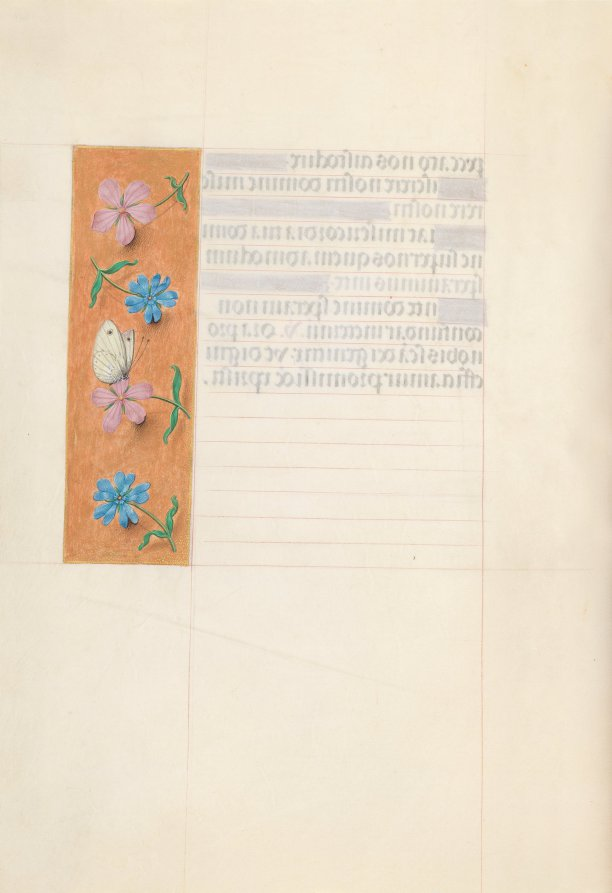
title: Hours of Queen Isabella the Catholic, Queen of Spain: Fol. 114v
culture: Flanders, Ghent and Bruges, late 15th century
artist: Master of the First Prayerbook of Maximillian (Flemish, c. 1444–1519)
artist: and Associates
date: c. 1500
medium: ink, tempera, and gold on vellum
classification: Bound Volume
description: This manuscript was illuminated by a circle of at least five highly organized manuscript painters active in the Flemish cities of Ghent and Bruges. The principal illuminator was Alexander Bening, who painted the majority of the book's miniatures. Manuscripts produced by this circle of artists are renowned for the decoration of their borders, which typically feature a rich variety of realistically-painted flowers, birds, and butterflies. This prayer book, called a book of hours, was intended not for a cleric, but for the private devotions of a lay person-in this case, Isabella the Catholic, Queen of Spain (1451-1504). Isabella's coat of arms embellishes the book's frontispiece. It is unlikely that the book was commissioned by the Queen herself; rather, she probably received it as a diplomatic gift from someone courting her patronage, perhaps Cardinal Francisco Jimenez de Cisneros. A Franciscan friar, Jimenez was dependent upon Isabella for his advancement, first to the post of Queen's confessor in 1492, and then to Archbishop of Toledo in 1495.